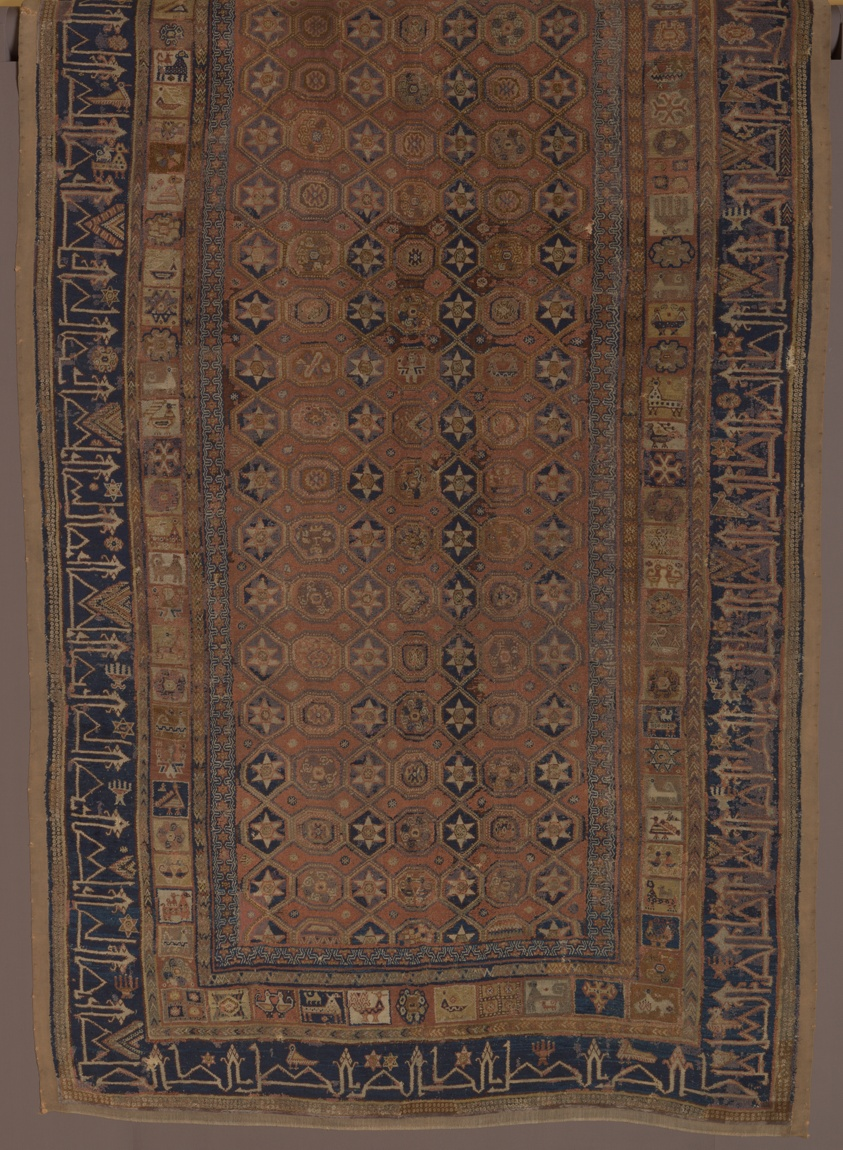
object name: Textile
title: Carpet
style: hispano-moresque, medieval, european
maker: Hispano-Moresque; Spain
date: Before 1473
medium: Wool, plain weave with supplementary wefts forming cut pile through a technique known as "Spanish knots"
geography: Spain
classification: weaving - carpet; textile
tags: geometric motif, abstract figures, animals, birds, cross motif, script, stars